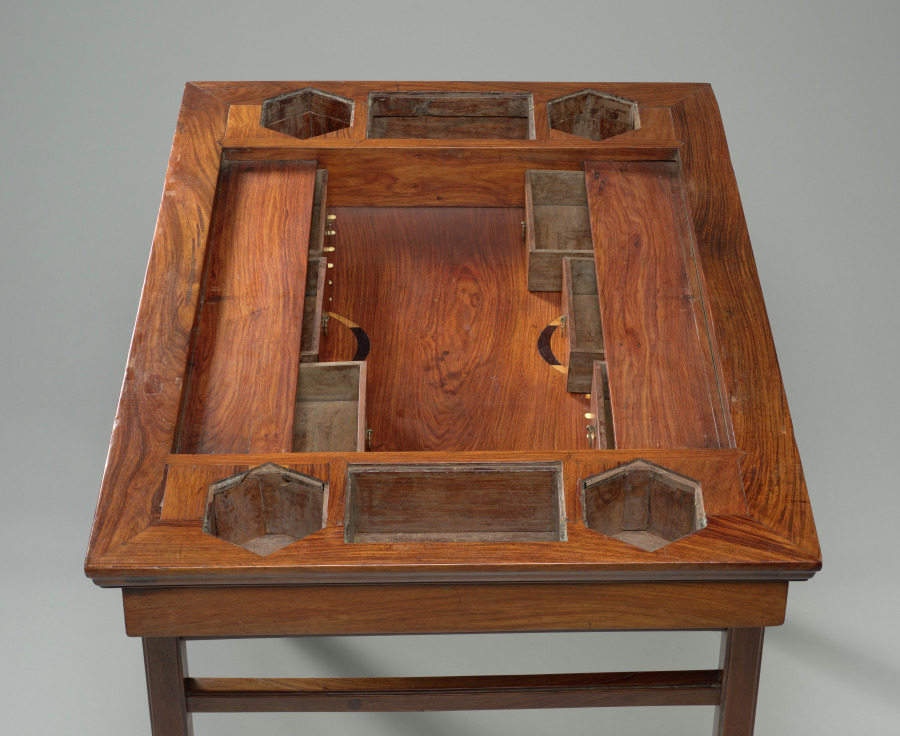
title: Game Table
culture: China, Ming dynasty (1368-1644) - Qing dynasty (1644-1911)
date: 1600s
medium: Rosewood (huanghuali)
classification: Furniture and woodwork